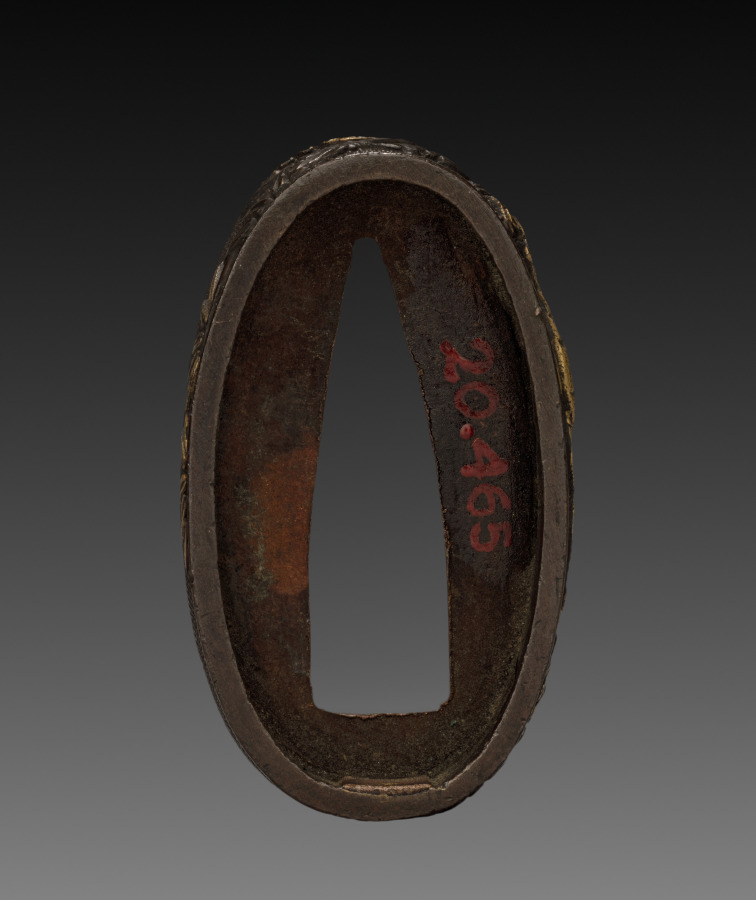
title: Sword-Hilt Collar (Fuchi) with Tiger in Bamboo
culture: Japan, Edo period (1615–1868)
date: 1700–1850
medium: shakudo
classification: Arms and Armor